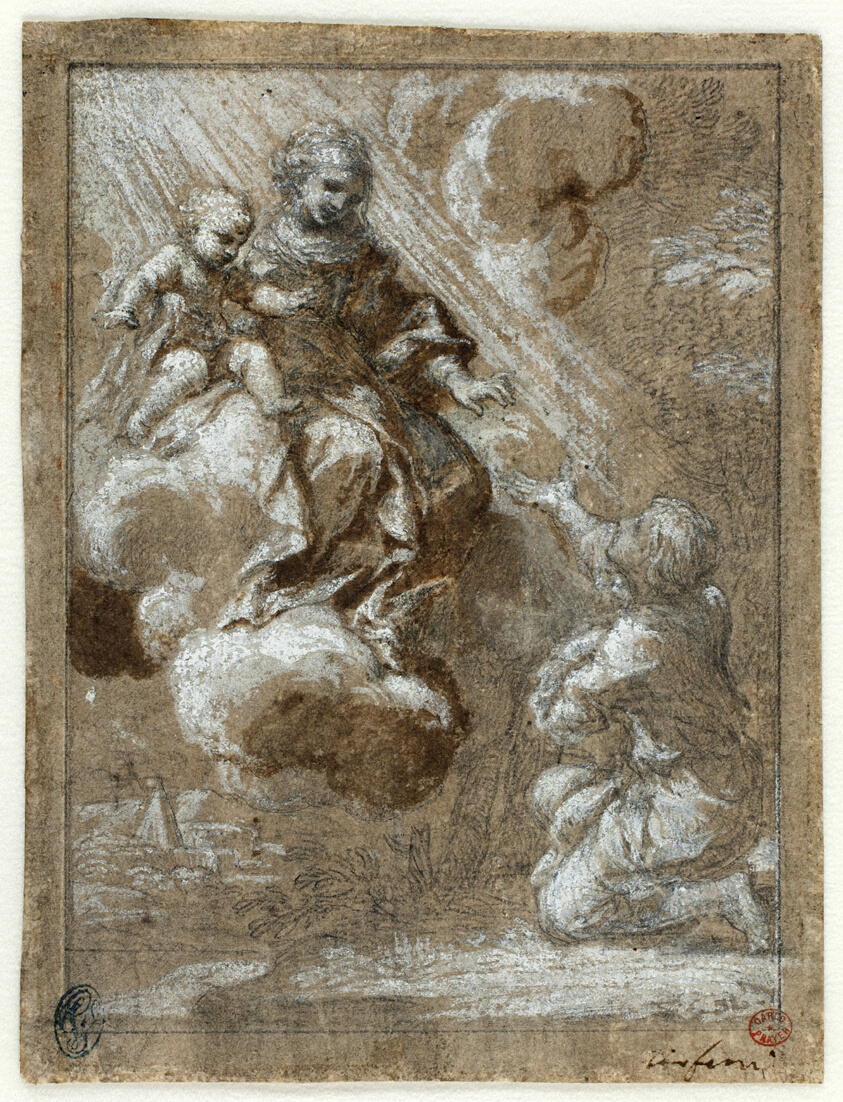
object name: Drawing and Watercolor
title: The Madonna and Child in Glory Appearing to a Kneeling Young Man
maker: Ciro Ferri (Italian, 1634–1689)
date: 1655/59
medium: Black chalk and brush and brown wash, incised with graphite, heightened with white gouache, on ivory laid paper, prepared with brown wash (recto); graphite or black chalk on ivory laid paper (verso)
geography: Italy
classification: prints and drawing; wash; chalk; drawings (visual works)